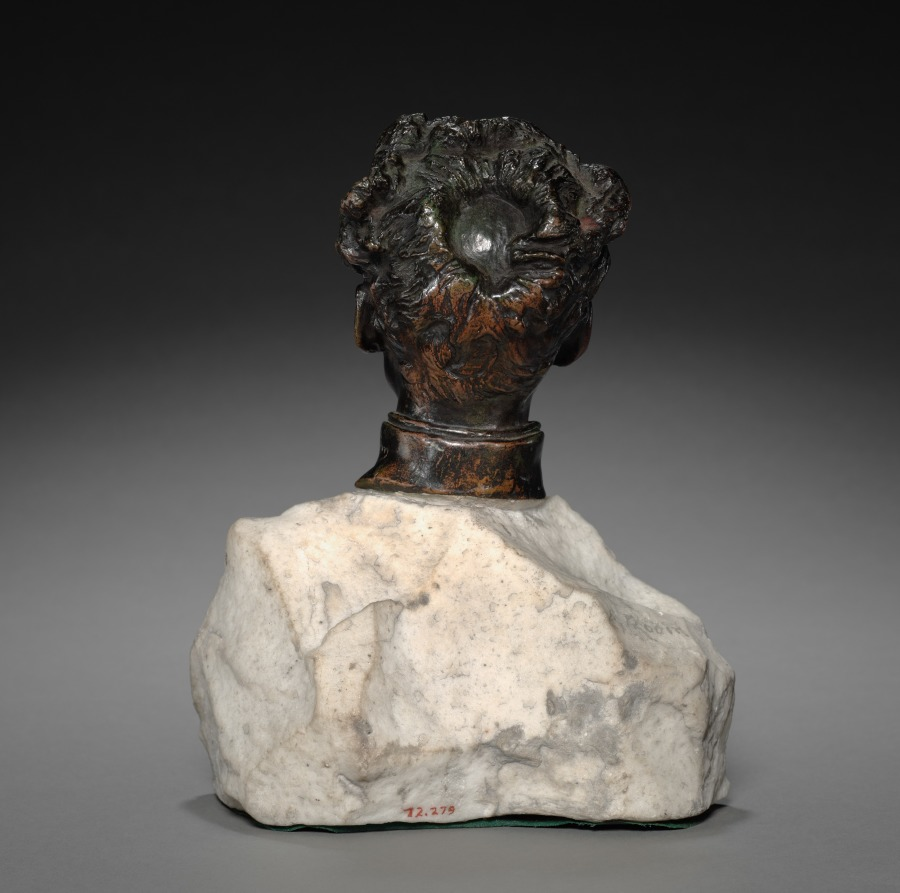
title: Father Pierre-Julien Eymard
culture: France, 19th century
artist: Auguste Rodin (French, 1840–1917)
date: ca. 1863 (original model)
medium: bronze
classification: Sculpture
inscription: Signed on left side of collar: "Rodin"; on base, back right: "A. Rodin"